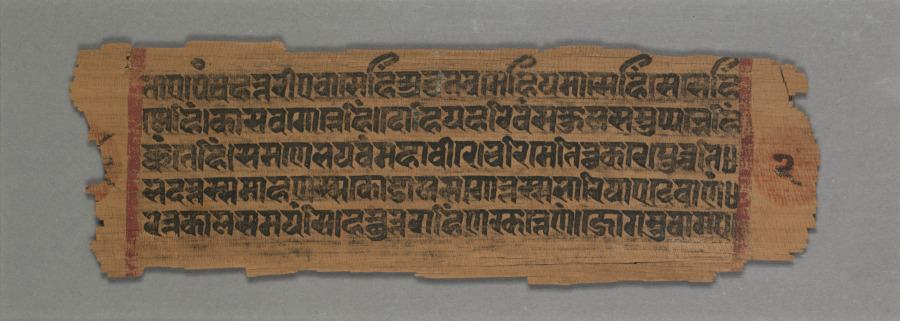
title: Folio 2 (verso), from a Kalpa-sutra and Story of Kalakacharya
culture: Western India, Gujarat, 13th century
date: 1287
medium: gum tempera and ink on palm leaf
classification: Painting